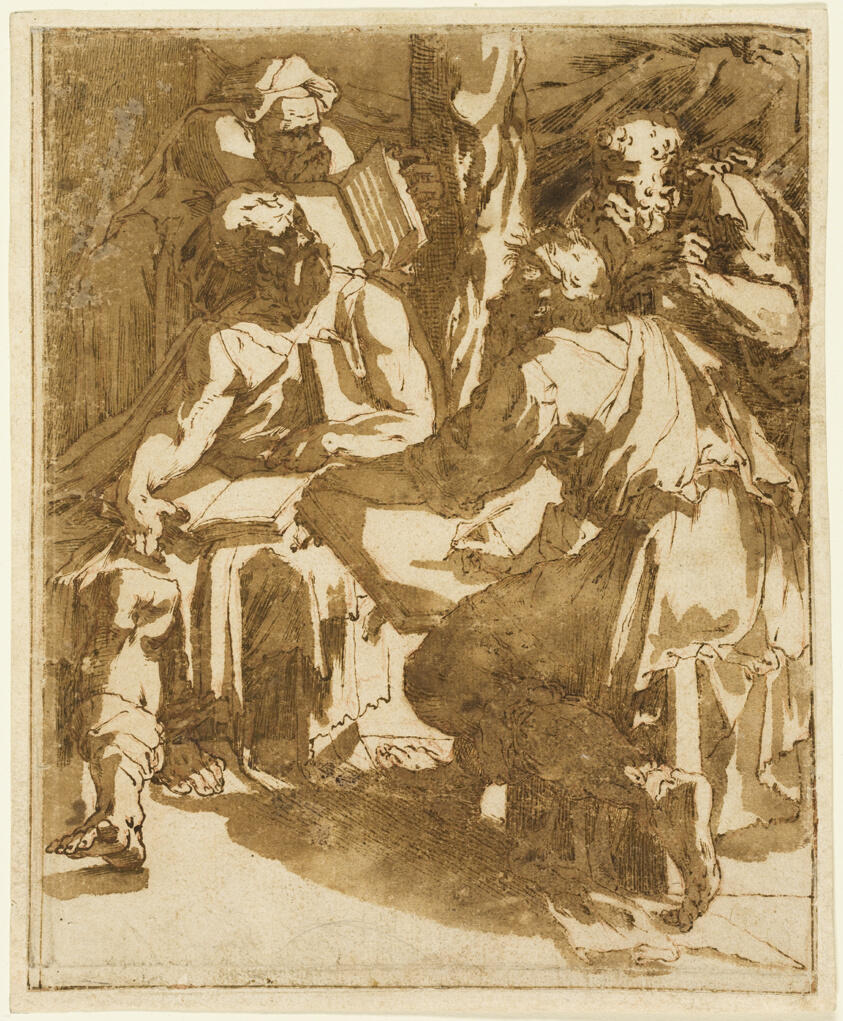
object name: Drawing and Watercolor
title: Four Evangelists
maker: After Domenico Beccafumi, called Il Mecarino; Italian, 1484-1551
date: c. 1544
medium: Pen and brown ink and brush and brown wash, over red chalk, on ivory laid paper, laid down on ivory laid paper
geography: Italy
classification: ink and wash; drawings (visual works); prints and drawing